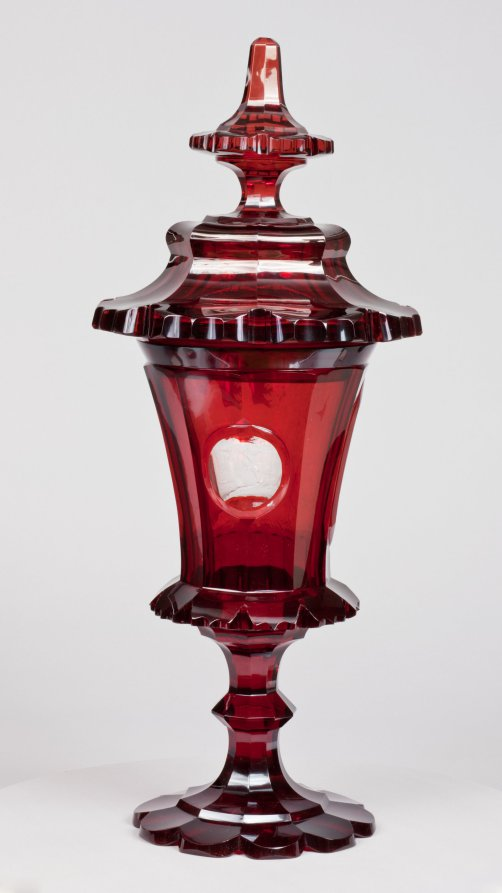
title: Covered Cup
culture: Bohemia, 19th century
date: mid-1800s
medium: ruby glass with engraved decoration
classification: Glass